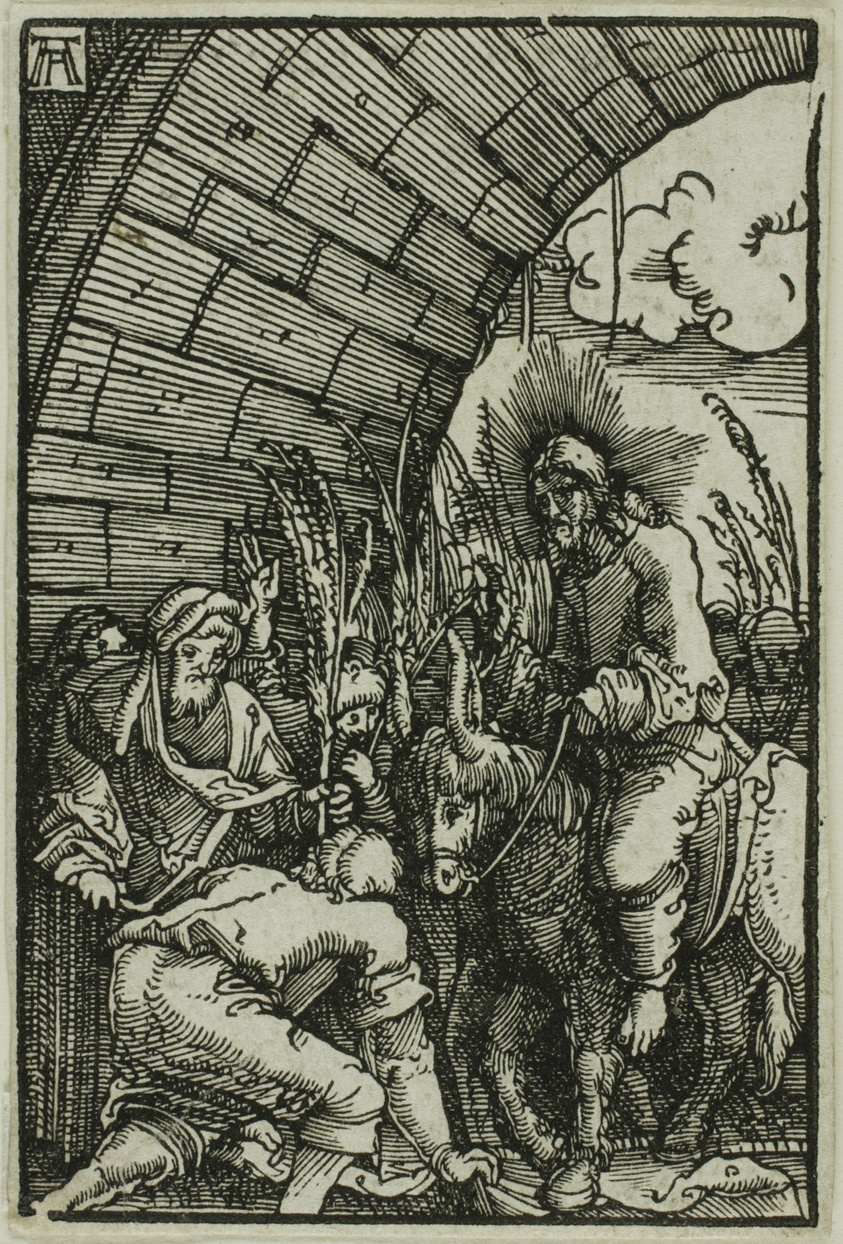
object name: Print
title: The Entry into Jerusalem, from The Fall and Redemption of Man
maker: Albrecht Altdorfer (German, c.1480-1538)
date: 1513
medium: Woodcut in black on ivory laid paper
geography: Germany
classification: wood engraving; print; prints and drawing